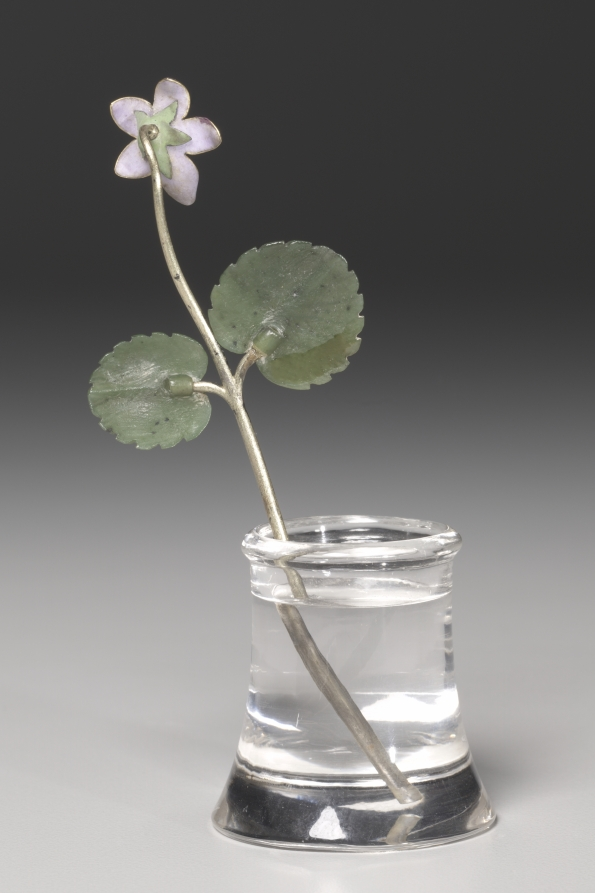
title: Flower Study of a Violet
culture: Russia, St. Petersburg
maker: House of Fabergé (Russian, 1842–1918)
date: c. 1885–1915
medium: enamel, silver gilt, jade, diamond, rock crystal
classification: Miscellaneous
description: This flower study depicts a single stem of violet. Fabergé’s inspiration for his flower studies is said to have come from the floral brooches of precious stones that were made in the 1700s for Catherine the Great as well as from the Japanese art of flower arranging, known as ikebana. Small and delicate, Fabergé’s flower studies were given as intimate gifts to friends by the tsarina and others in the court. She also liked to take them around to wherever the imperial family was residing as a reminder of spring during the harsh Russian winters.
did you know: The stems of Fabergé’s flower studies are set into little basins carved from rock crystal to resemble pots of water.